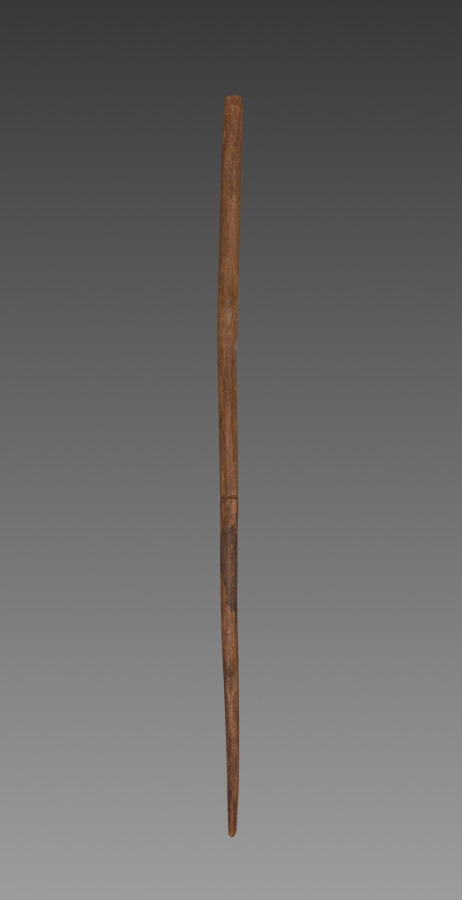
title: One of Three Pieces of an Arrow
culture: Egypt, First Intermediate period (2123–2040 BCE)–Middle Kingdom (2040–1648 BCE)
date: 2123–1814 BCE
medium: wood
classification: Arms and Armor